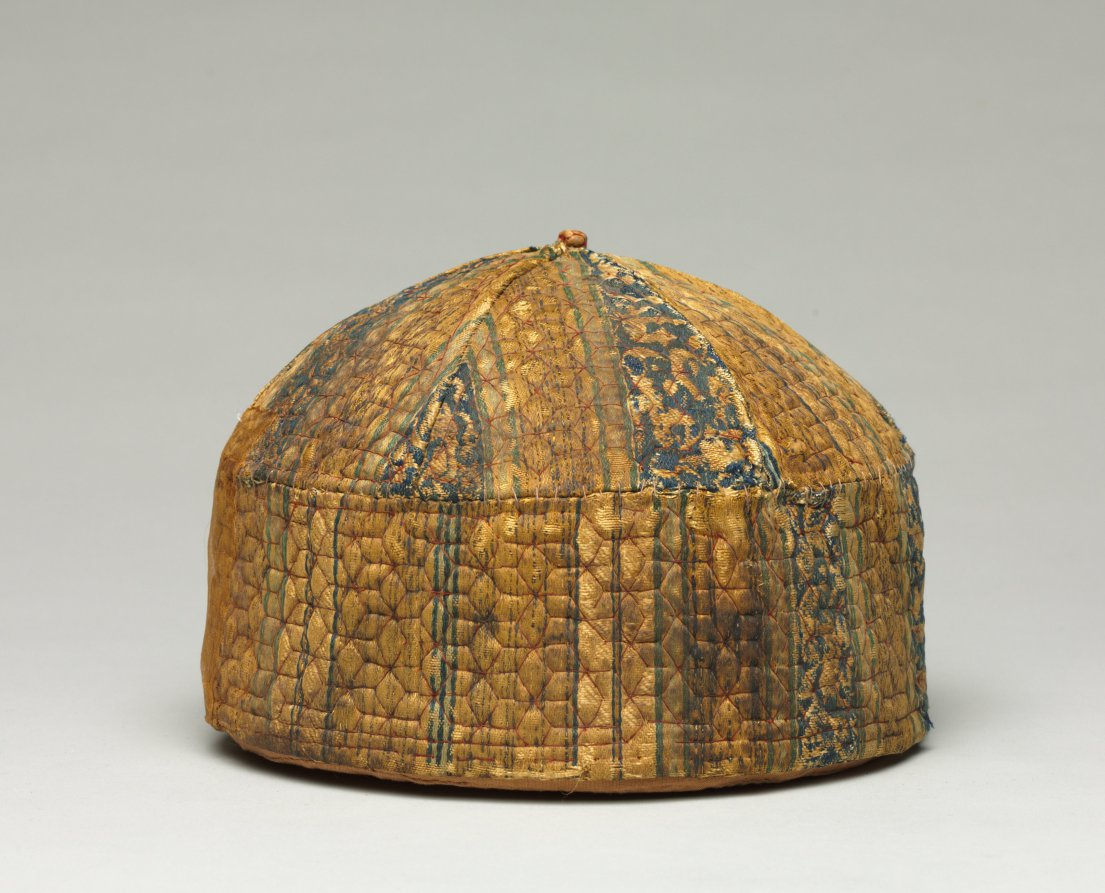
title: Cap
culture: Syria or Egypt, Mamluk Dynasty (1250–1517)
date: 1300s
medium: lampas, quilted: silk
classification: Textile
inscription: 1) Glory to our Lord, the Sultan 2) Glory to our Lord, the Sultan al-Malik, al-Nasir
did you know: The winter-weight quilted cap was part of a set with a matching quilted vest.